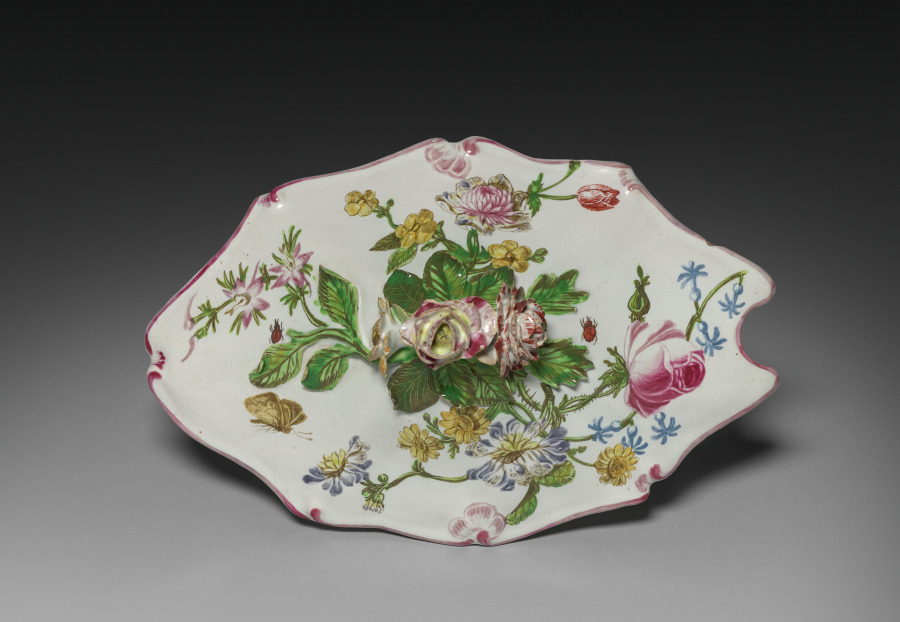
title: Cover for a Sauce Tureen with Attached Stand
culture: France, Marseilles, 18th century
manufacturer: Veuve Perrin Factory (French)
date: c. 1765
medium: tin-glazed earthenware (faience) with enamel decoration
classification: Ceramic